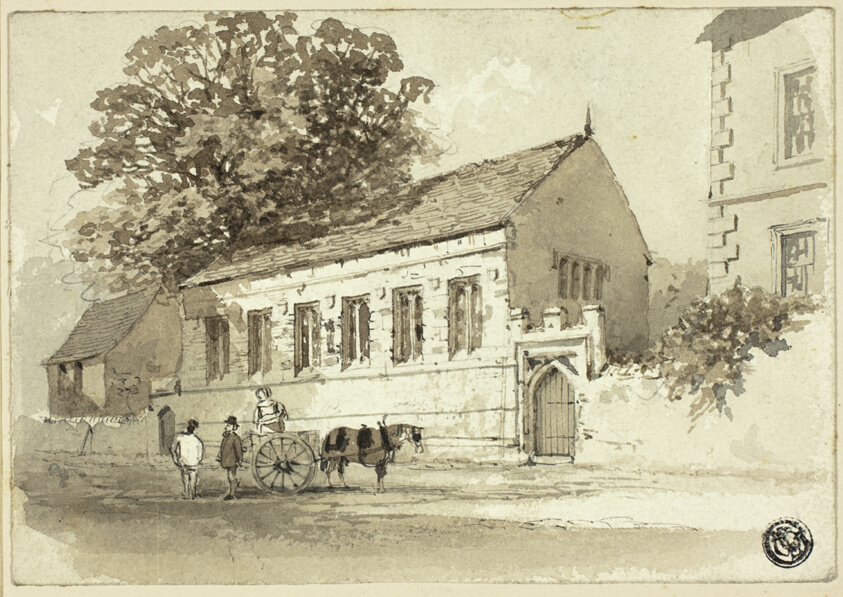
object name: Drawing and Watercolor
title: Church Street, Grantham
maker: Alfred Rimmer (English, 1829-1893)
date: c. 1860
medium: Pen and brown and black ink, with brush and brown and gray wash, over graphite, on ivory wove paper, laid down on buff board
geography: England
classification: ink or chalk wash; drawings (visual works); prints and drawing